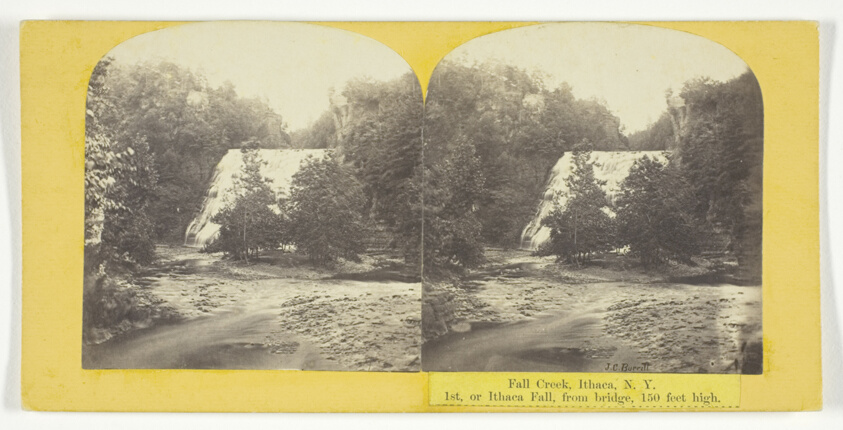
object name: Photograph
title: Fall Creek, Ithaca, N.Y. 1st, or Ithaca Fall, from bridge, 150 feet high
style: 19th century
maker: J. C. Burritt; American, active 1860s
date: 1860/65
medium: Albumen print, stereo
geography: Ithaca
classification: photography; photograph; albumen silver print; stereograph (albumen)